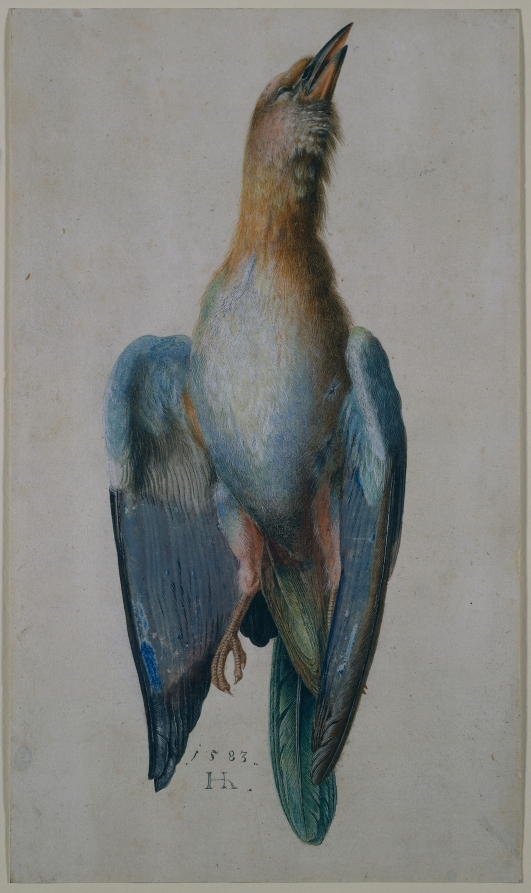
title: Dead Blue Roller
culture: Germany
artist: Hans Hoffmann (German, 1545/50–1591/92)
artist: after Albrecht Dürer (German, 1471–1528)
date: 1583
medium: watercolor and gouache with touches of gold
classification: Drawing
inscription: signed, lower center, in gray ink: 1583 / [artist's monogram: Hh]; verso, upper left, in ink (?, visible through transmitted light): 182 [sideways]; upper right, in ink (?): 7 [illegible]; center left, in ink (?): 182; lower left, in ink (?): [11?]; lower center, in ink (?): 50; verso of secondary support, lower right, in graphite: 3.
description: Half a century after the death of the German Renaissance artist Albrecht Dürer, his work continued to inspire artists and collectors. Hans Hoffmann was well known for his copies of Dürer’s nature studies, and in 1583 he faithfully copied Dürer’s celebrated drawing of a dead blue roller of 1512 in this exquisite watercolor. A network of very fine brushstrokes imitates the individual plumes of the bird’s underside while simultaneously suggesting an overall soft, downy texture. Several other copies of Dürer's composition exist, including one by Hoffmann in London. Both the London sheet and this sheet were signed with Hoffman’s prominent monogram and dated, indicating that he could not have intended them to pass as originals by the older master. Likely, he meant the drawing as an homage to the greatest German artist of the 1500s; his endeavor may have been sponsored by the Nuremberg-based Imhoff family, who owned Dürer's blue roller around the time this drawing was made.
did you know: This realistic portrait of a dead bird signals a turn toward objective depictions of nature in the 1500s.